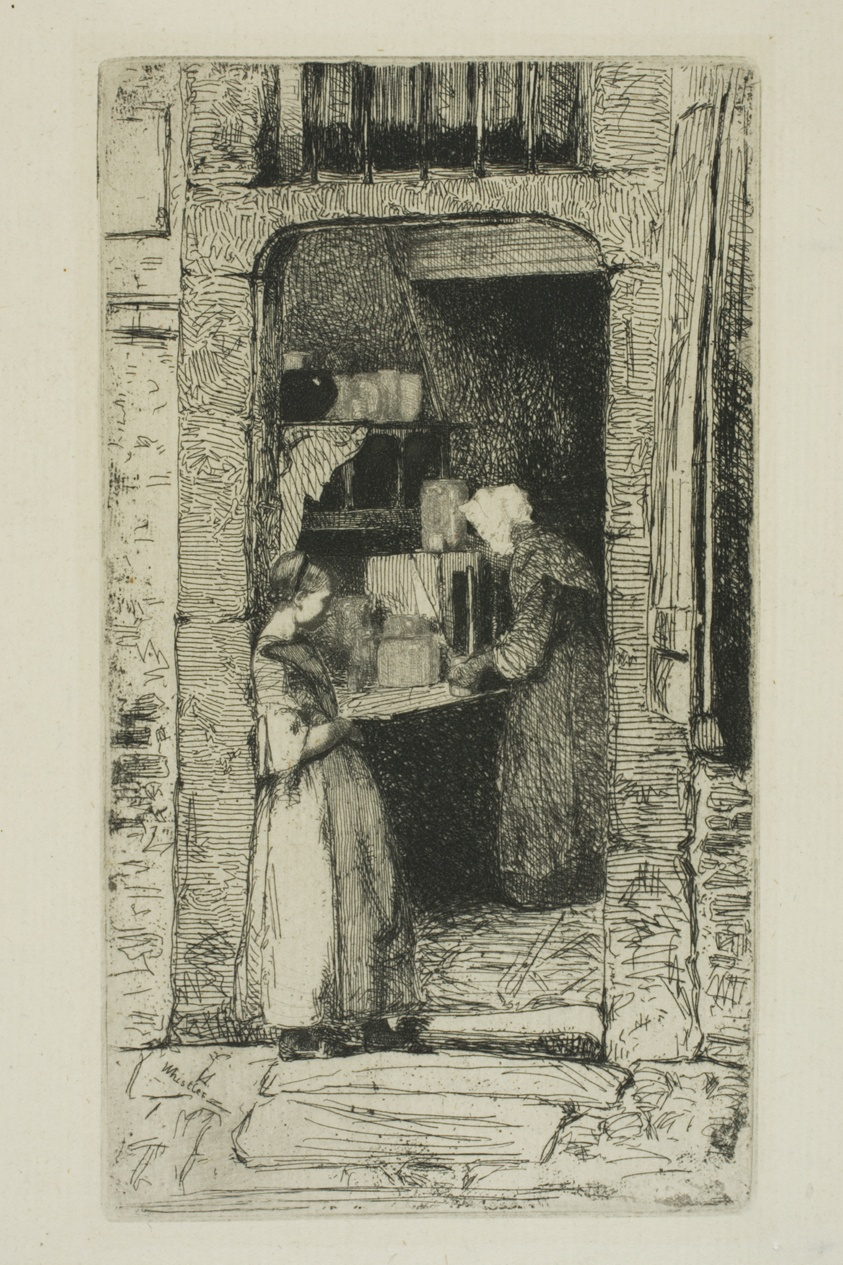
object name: Print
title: La Marchande de Moutarde (The Mustard Seller)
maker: James McNeill Whistler (American, 1834-1903)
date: 1858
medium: Etching with foul biting in black ink on cream laid paper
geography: United States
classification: etching; foul biting; print; prints and drawing; paper